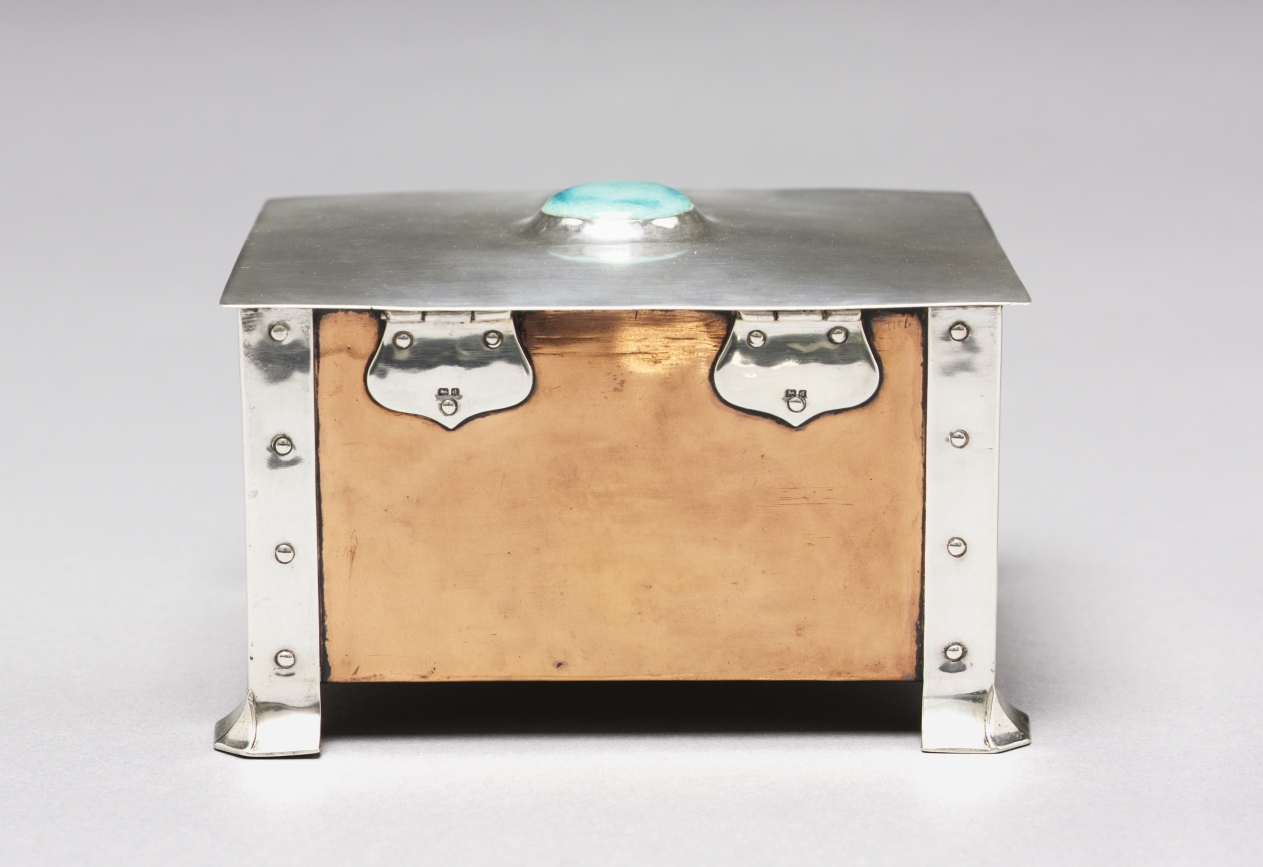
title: Covered Box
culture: England, Birmingham, early 20th Century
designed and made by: A. Edward Jones (British, 1878–1954)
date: 1903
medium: silver, copper, ceramic with wood lining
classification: Metalwork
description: British designer Albert Edward Jones founded A. Edward Jones in 1902, an Arts and Crafts metalworking firm that primarily produced ecclesiastical and domestic objects at the time of this box's creation. The box combines silver and copper metalwork, sleekly designed with limited embellishment.